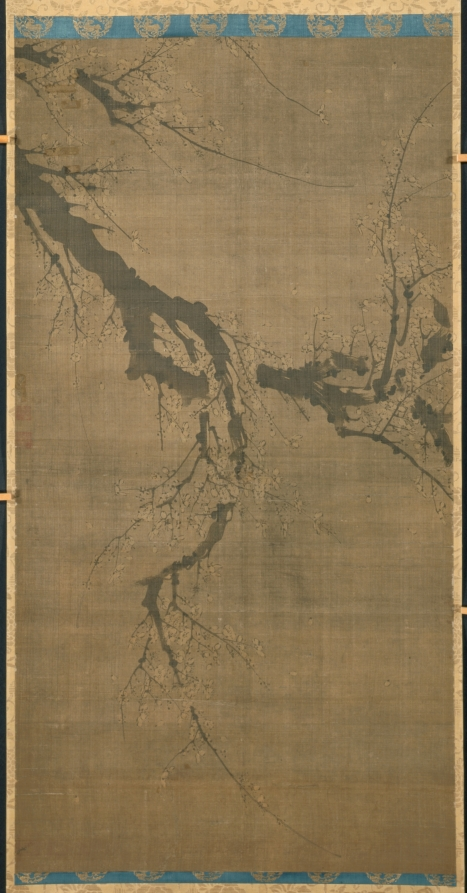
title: Ink Plum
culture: China, Ming dynasty (1368–1644)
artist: Peng Xu (Chinese, active 1488–1521)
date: late 1400s–early 1500s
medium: hanging scroll, ink on silk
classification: Painting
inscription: Artist's 2 seals at left middle edge of painting: Peng shi Te-mien; Shih-chu.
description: Seasonal paintings, including those depicting flowering plum trees in early spring, furnished scholars’ studios or other interior spaces in the house. Peng Xu is considered the foremost follower of the famous plum blossom painter Wang Mian (1287–1359) (see CMA 1974.26). The branches are brushed in the same vigorous manner leaving white streaks in the ink indicating the gnarled bark. The delicate blossoms are drawn in fine lines, while a gray wash covers the entire surface, only leaving the flower petals in reserve.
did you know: Plum trees blossom in the first months of the year; the delicate flowers endure the harsh winter frosts. A popular motif in Chinese ink painting, the plum symbolizes the winter season and is a harbinger of spring.